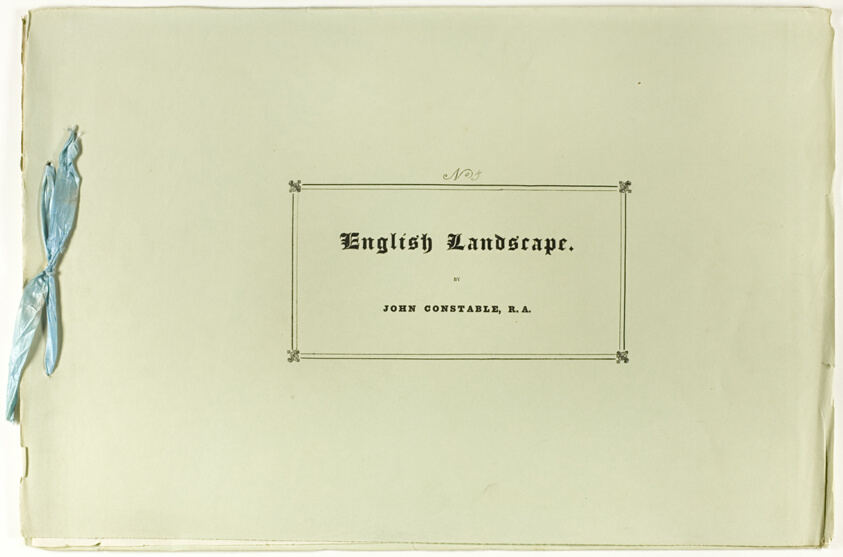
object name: Print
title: Various Subjects of Landscape Characteristic of English Landscape Scenery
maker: David Lucas (English, 1802-1881); after John Constable (English, 1776-1837)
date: 1830/32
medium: Portfolio cover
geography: England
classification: portfolio cover; portfolio; prints and drawing; print